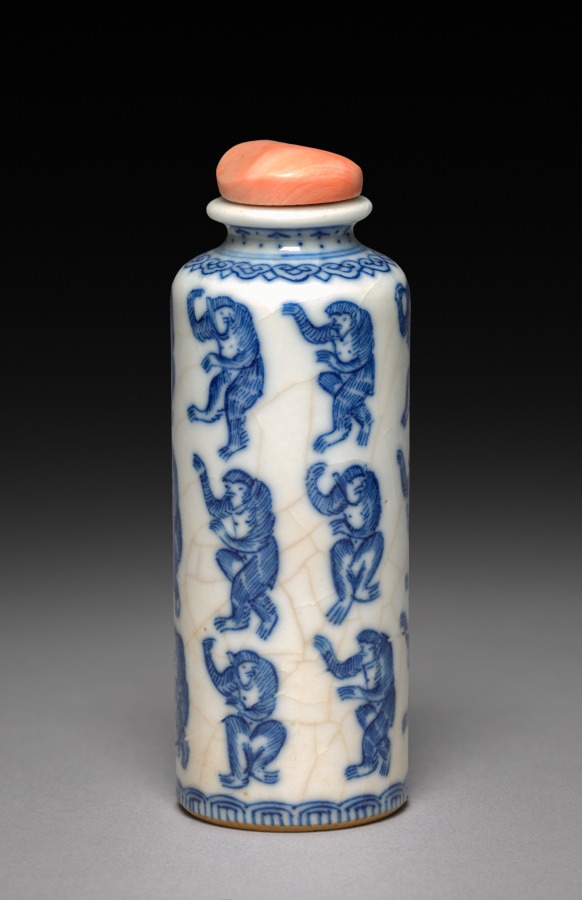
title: Snuff Bottle with Stopper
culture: China, Jiangxi Province, Jingdezhen kilns, Qing dynasty (1644–1911), Yongzheng mark and reign (1723–35)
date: 1723–35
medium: porcelain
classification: Ceramic